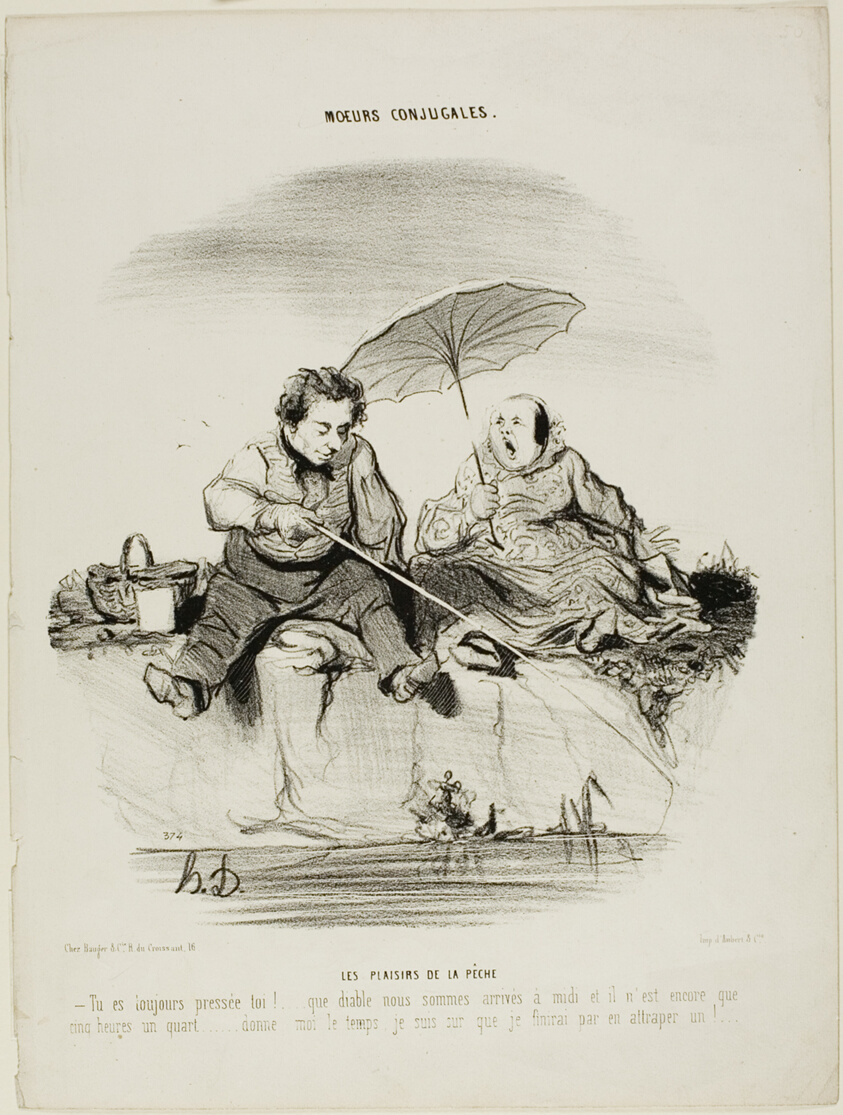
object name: Print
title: The Pleasures of Fishing. “- You are always in such a rush - Good God, we only just got here at noon and it is now only a quarter past five - Just give me a little more time, I am sure I'll end by catching one,” plate 50 from Moeurs Conjugales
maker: Honoré Victorin Daumier; French, 1808-1879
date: 1842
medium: Lithograph in black on white wove paper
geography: France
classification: lithograph; print; prints and drawing